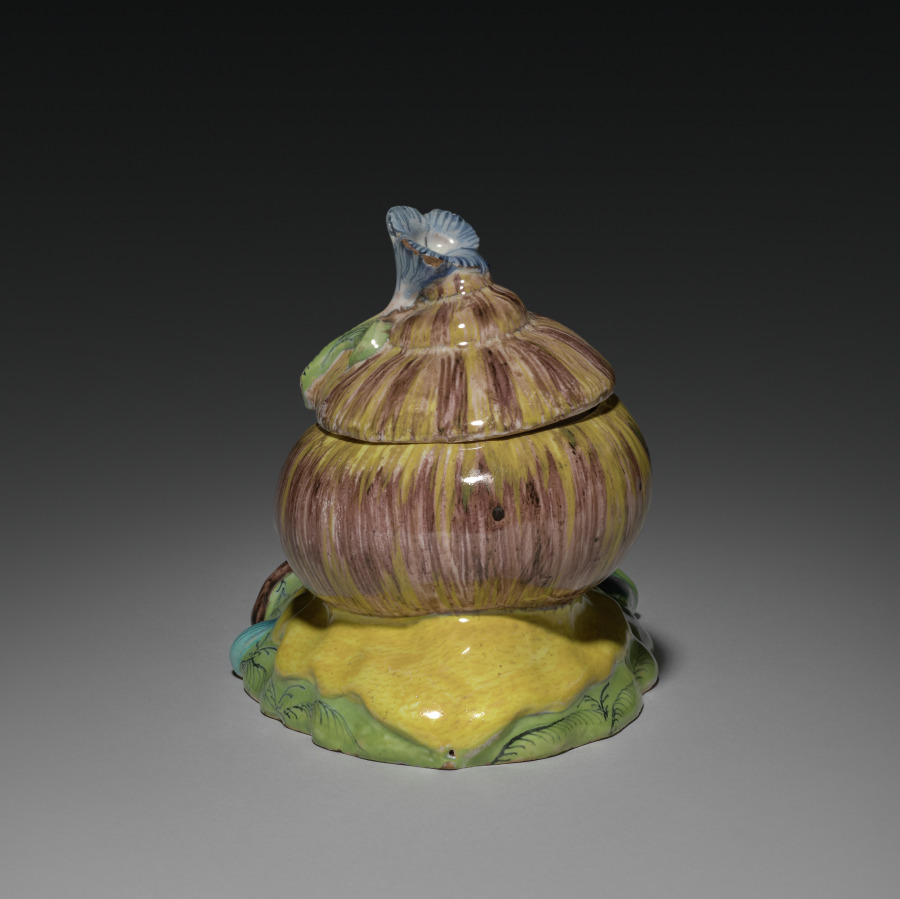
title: Covered Box in the Form of a Snail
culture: France, 18th century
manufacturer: Strasbourg Factory (France)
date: c. 1750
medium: faience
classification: Ceramic